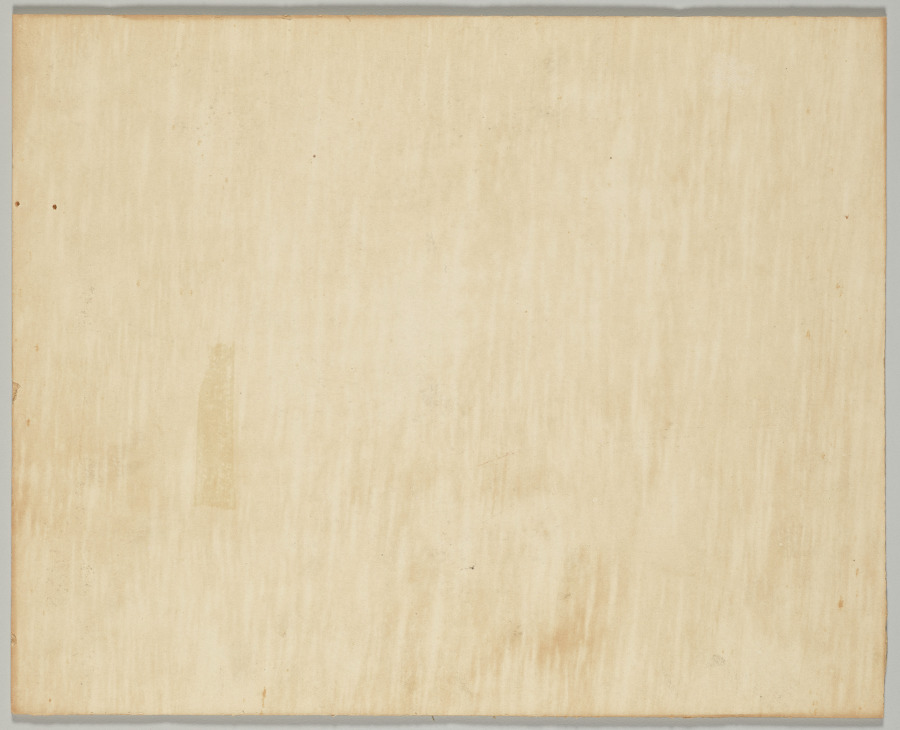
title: Nuns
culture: France, 19th century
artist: Anonymous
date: mid-1800s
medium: black and white chalk on gray laid paper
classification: Drawing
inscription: Inscribed, at lower left, in black chalk, illegible (“PD”?)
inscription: Inscribed, at lower right, in pencil, “9 ½ x 11”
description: In this drawing, a group of young nuns gather to pray. The unknown French artist used white chalk to delicately highlight the central figure with clasped hands. The work suggests the new style and subject matter that proliferated throughout France during the mid-19th century when an emerging middle-class audience became interested in collecting art and viewing it in exhibitions such as the Paris Salon.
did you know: This drawing’s anonymous artist used a combination of black and white chalk to create a dramatic pattern of highlights and shadows.